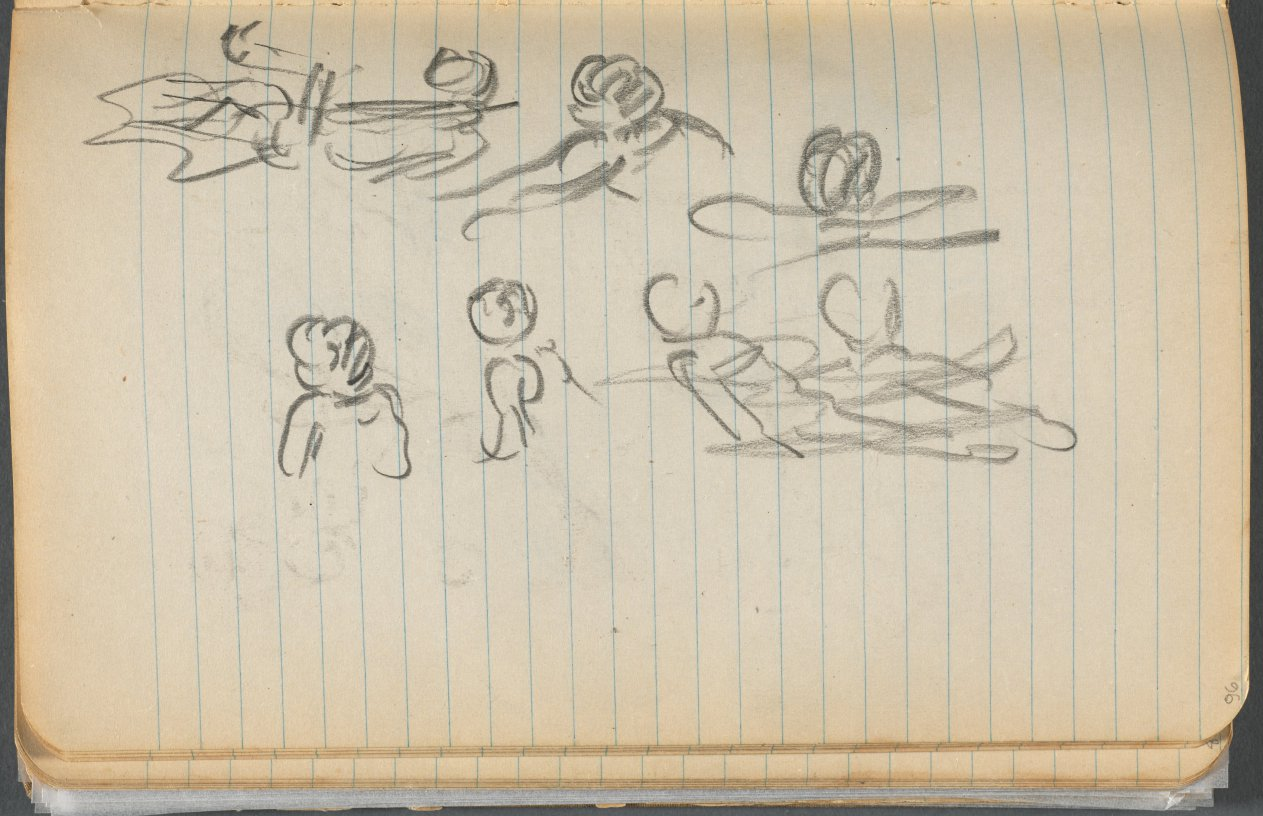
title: Sketchbook, page 096: Swimming Figures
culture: America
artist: Maurice Prendergast (American, born Newfoundland [now Canada], 1858–1924)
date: 1905–10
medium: graphite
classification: Bound Volume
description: This sketchbook contains 69 pages of drawings, a diary largely devoted to the state of the artist's health, and a three-page discourse on the nature of genius and ideas.